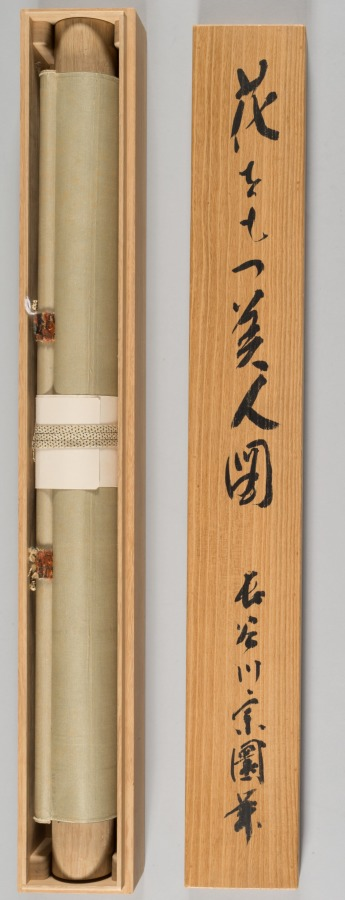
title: A Couple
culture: Japan, Momoyama period (1573–1615)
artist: Hasegawa Sōen (Japanese)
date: late 1500s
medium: hanging scroll; ink on paper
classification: Painting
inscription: Artist's seal at lower left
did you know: The person on the right holds a spray of chrysanthemums, while the other has daffodils suspended upside down from a stalk held over their shoulder.